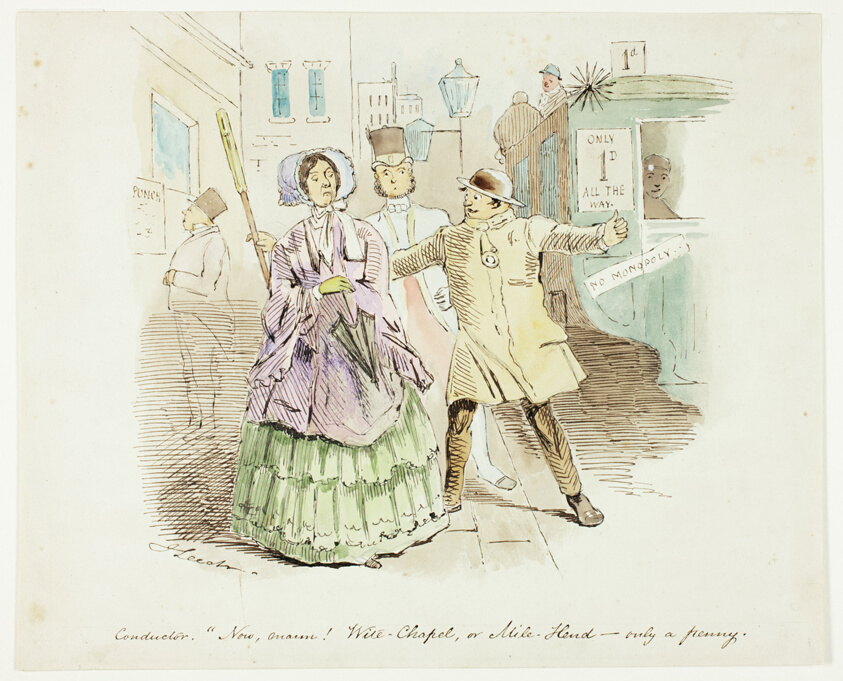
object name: Drawing and Watercolor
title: Conducter, 'Now Marm! Wait-Chapel or Mile Hend-only a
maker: Attributed to John Leech; English, 1817-1864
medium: Watercolor and pen and brown ink, over graphite, on cream wove paper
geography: England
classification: watercolor; drawings (visual works); prints and drawing